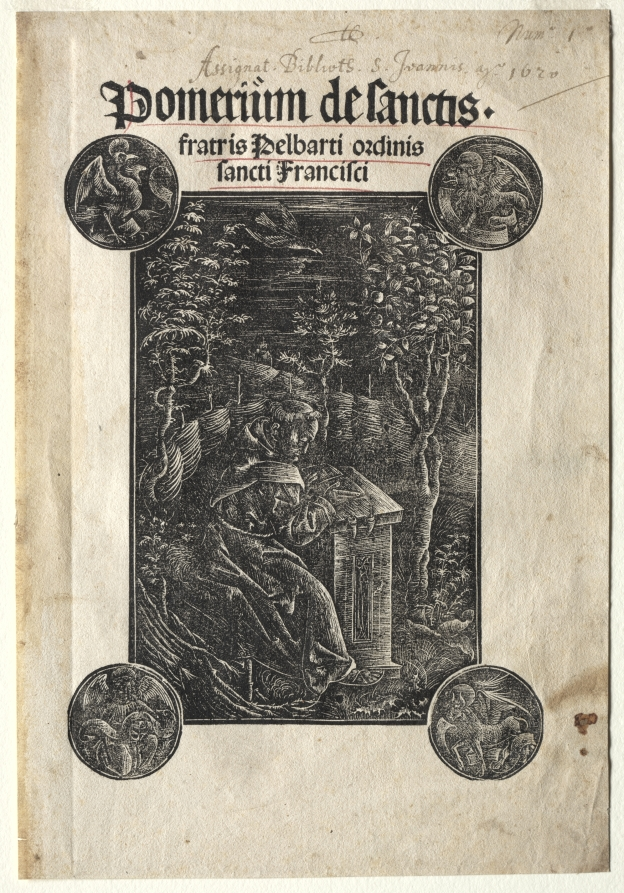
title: Pelbart of Temesvar Studying in a Garden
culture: Germany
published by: Johann Otmar(?)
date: 1620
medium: woodcut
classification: Print